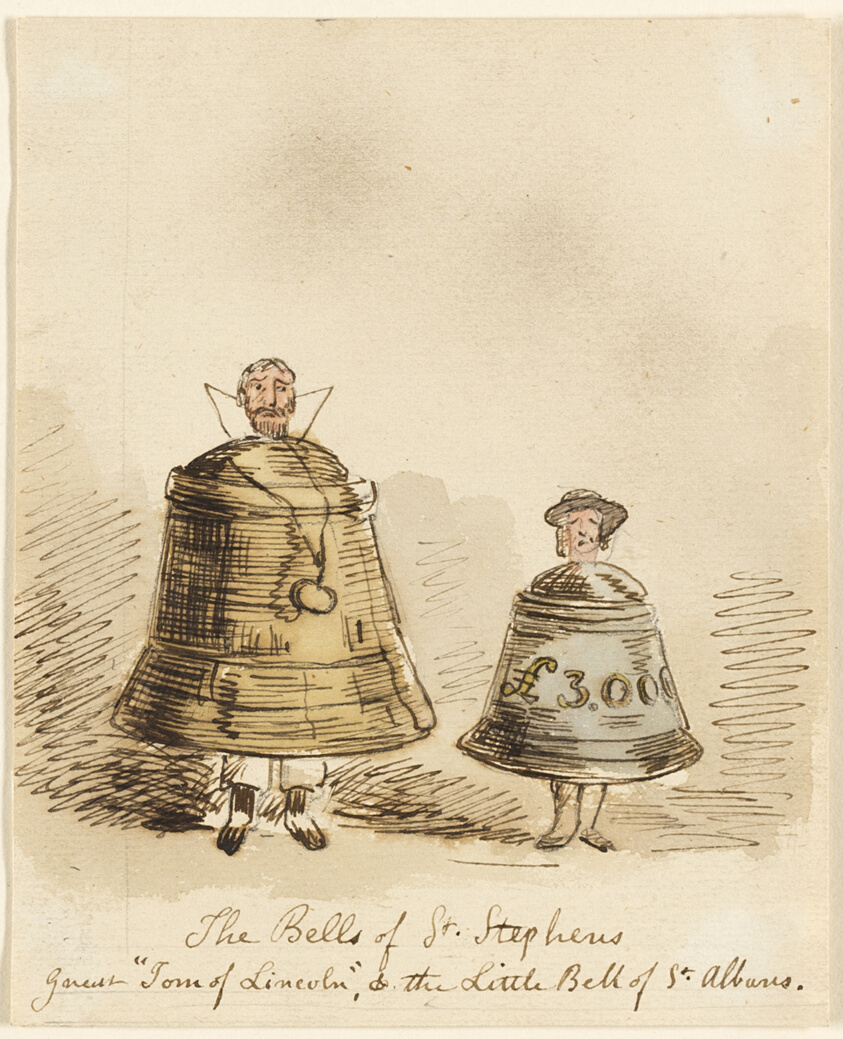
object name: Drawing and Watercolor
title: The Bells of Saint Stephens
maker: John Leech (English, 1817-1864)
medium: Watercolor and pen and brown ink, over graphite, on cream wove paper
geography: England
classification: watercolor; drawings (visual works); prints and drawing